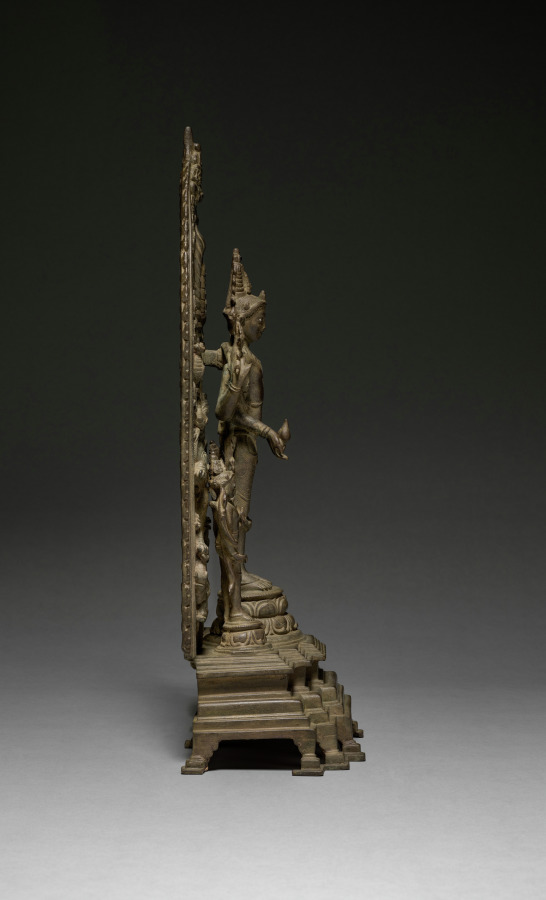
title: Vishnu Attended by Chakrapurusa and Shankhapurusa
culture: East India, Bengal, Pala period, 11th-12th century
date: 1000s–1100s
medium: bronze with silver inlay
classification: Sculpture